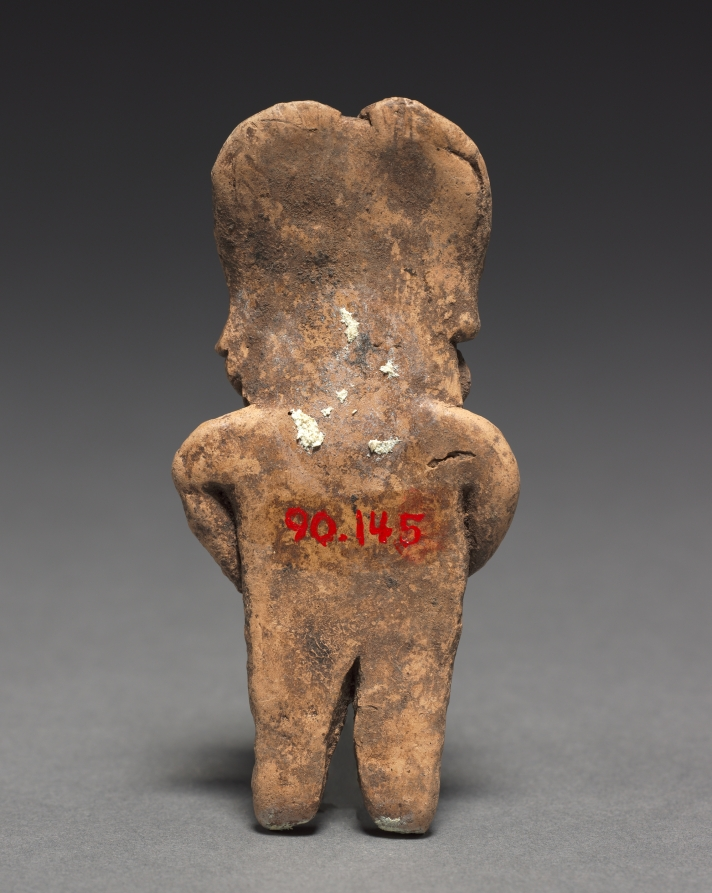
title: Male Figurine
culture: Mesoamerica, Mexico, Guanajuato, Chupícuaro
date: 400–100 BCE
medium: pottery with white and red pigment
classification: Sculpture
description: The Chupícuaro culture, located north of Mexico City in the state of Guanajuato, created a distinctive ceramic tradition including small clay figurines. This example is said to belong to a group of ten figurines from the same burial or cache (1990.145–154). The group includes both males and females that can be sorted into couples based on size.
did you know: Groups of figurines were sometimes arranged in scenes and likely used in household rituals.